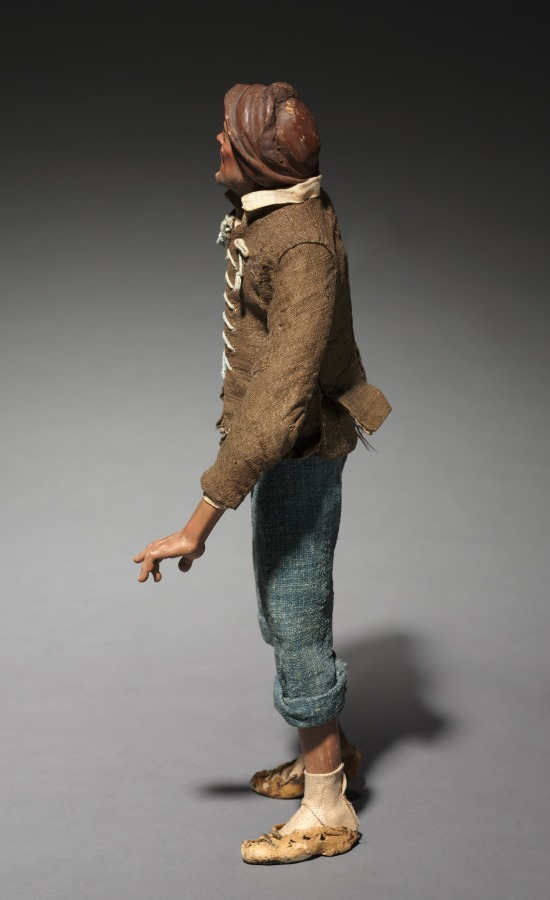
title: Figure from a Crèche: Shepherd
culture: Italy, Naples, late 18th-early 19th century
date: 1780–1830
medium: painted wood and terracotta with various textiles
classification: Sculpture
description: The practice of creating scenes of the Nativity for the home dates from the early 1700s in Italy, where people began to set up doll-like figures of about a foot or less in height. The custom was particularly popular in Naples around 1800, where crèche scenes (crèche means cradle, or crib) included many figures, whose heads and hands of painted terracotta, stuffed cloth bodies, and clothing adapted from contemporary local costumes gave them an amazingly realistic character. Representations of the birth of Jesus can be traced to the first few centuries of Christianity. Both living creatures and sculptural depictions of them were used from early times. By the late middle ages it was customary to create life-size figures of wood or stone, naturalistically painted, to represent the characters who participated in the events of Jesus's early life. These sculptures were then arranged in scenes illustrating one or both of the most important of these events, the Adoration of the Shepherds and the Adoration of the Magi-the three kings from the East who came to pay homage to the Christ child. Used in churches, these large figures were especially popular in Italy, Central Europe, Spain, and Portugal.